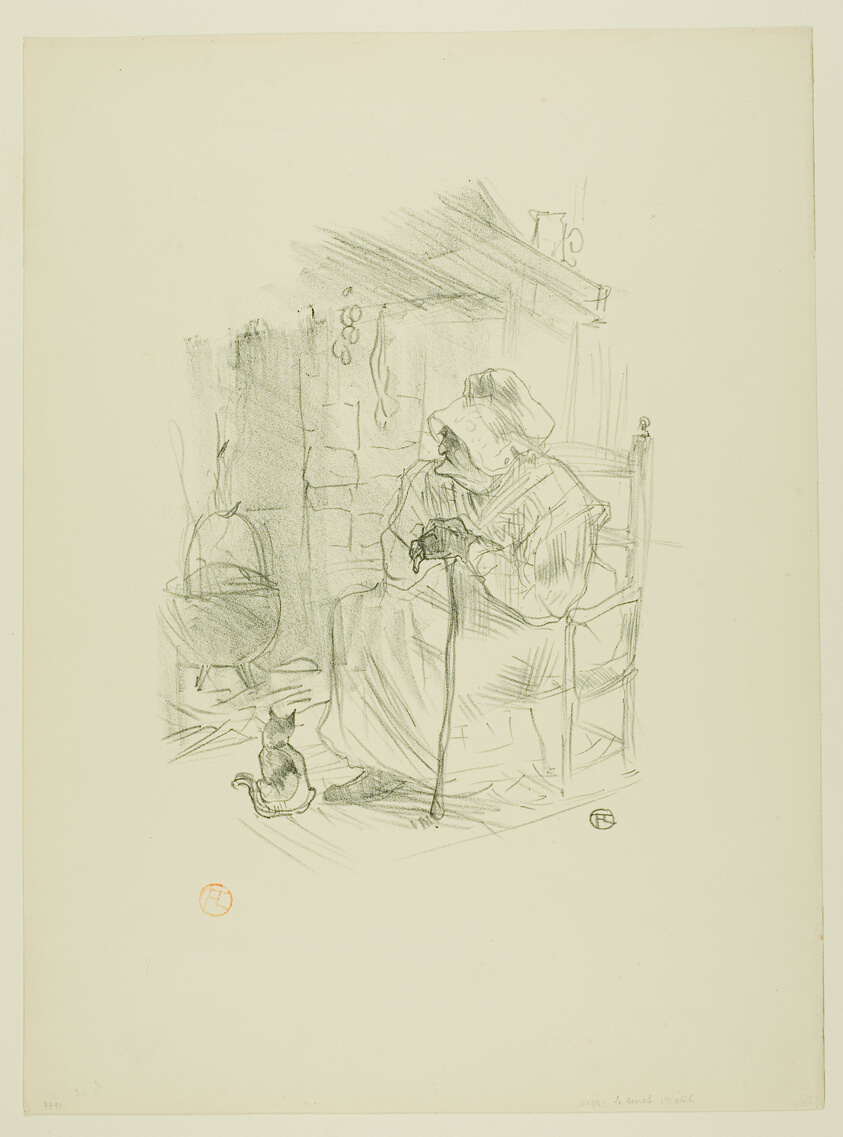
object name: Print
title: The Secret, from Mélodies de Désiré Dihau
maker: Henri de Toulouse-Lautrec (French, 1864-1901)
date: 1895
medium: Lithograph on cream wove paper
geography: France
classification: lithograph; print; prints and drawing